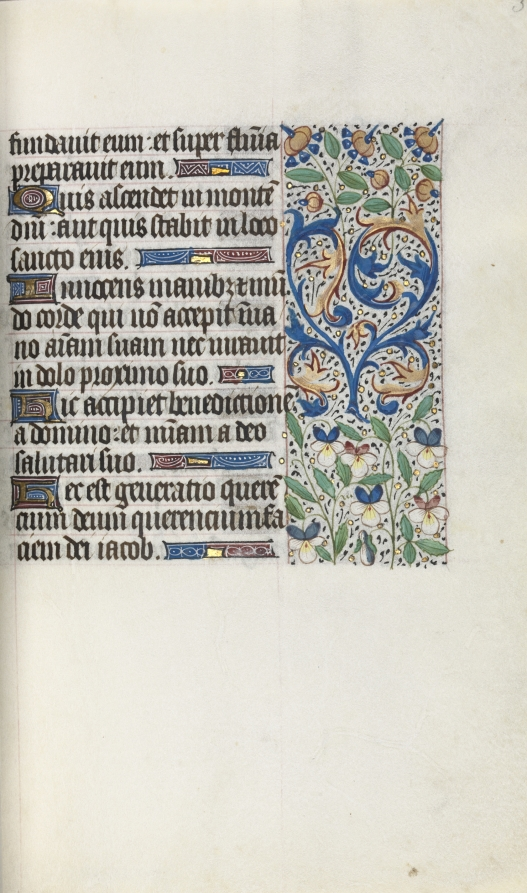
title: Book of Hours (Use of Rouen): fol. 34r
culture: France, Rouen, 15th century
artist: Master of the Geneva Latini (French, active Rouen, 1460–80)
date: c. 1470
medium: ink, tempera, and gold on vellum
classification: Bound Volume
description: In the late 1400s and early 1500s Rouen was an established and important center of book production. The city’s cathedral had a wealthy chapter that spent large sums of money to commission books and to maintain its extensive library. The stationers and booksellers would have likely been concentrated in or near the cathedral precinct. This artist, named after a manuscript now in Geneva, was Rouen’s principal illuminator during the second half of the 1400s.